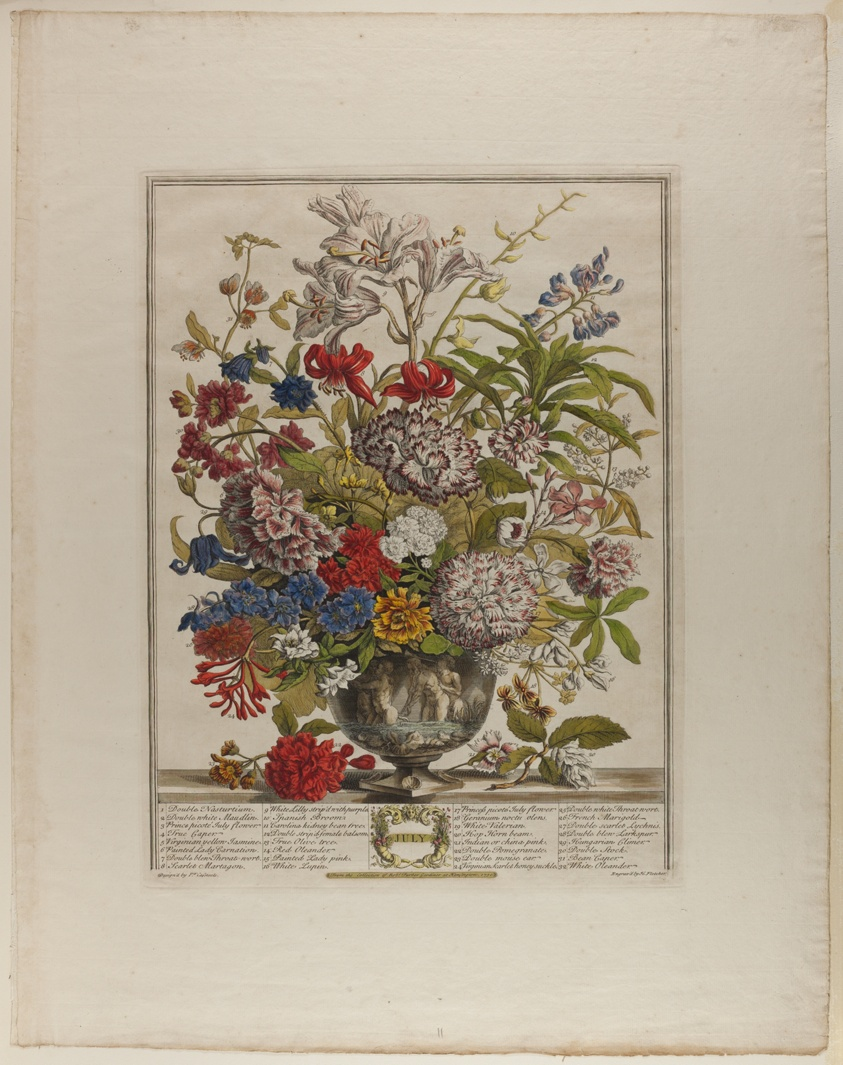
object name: Print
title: July, from Twelve Months of Flowers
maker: Henry Fletcher (English, 1710-1750); after Peter Casteels III (Flemish, 1684-1749)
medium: Engraving in black ink with opaque and translucent watercolor on cream laid paper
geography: England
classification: etching; print; prints and drawing